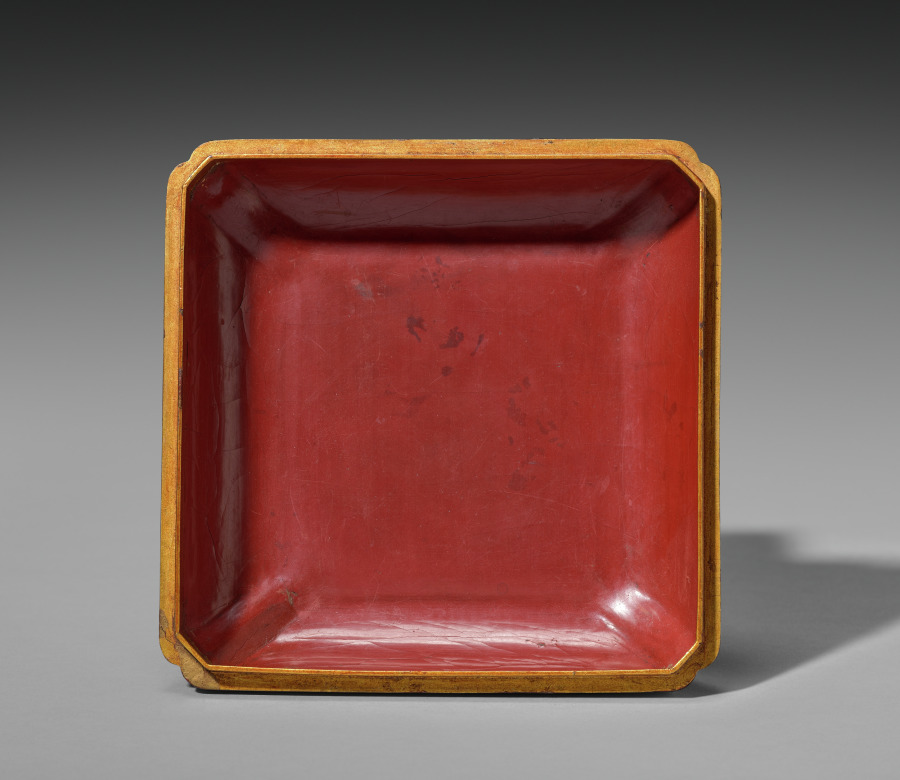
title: Wickerwork Box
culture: China, Ming dynasty (1368-1644), Wanli reign (1572-1620)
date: 1609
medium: lacquered wickerwork (of woven bamboo) framed in wood with circular scene inlaid in mother-of-pearl and gold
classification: Lacquer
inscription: Inscription at bottom in red on black lacquer reads: "commissioned by Yü-Yün-ch'i".